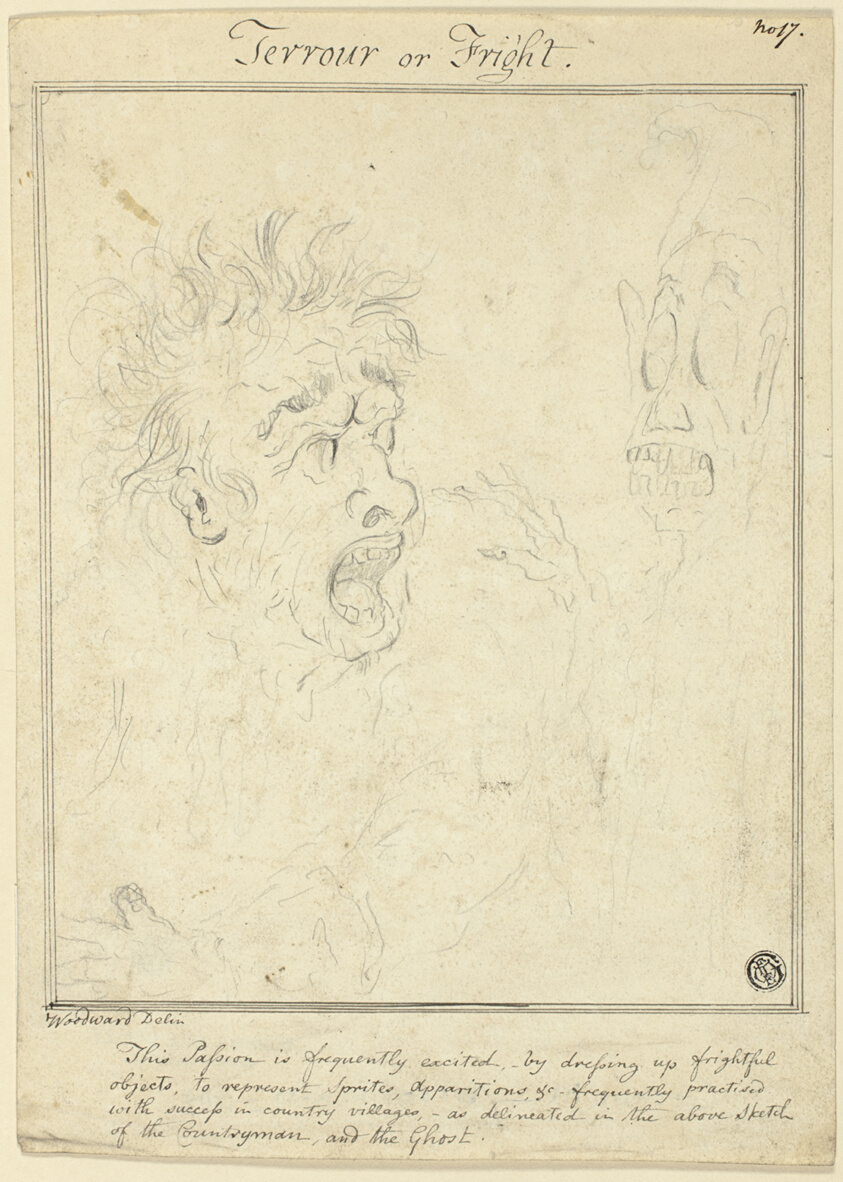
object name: Drawing and Watercolor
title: Terror or Fright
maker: George Woodward (English, c. 1760-1809)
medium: Graphite, with pen and brown ink (recto), and graphite (verso), on ivory wove paper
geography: England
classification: graphite; drawings (visual works); prints and drawing